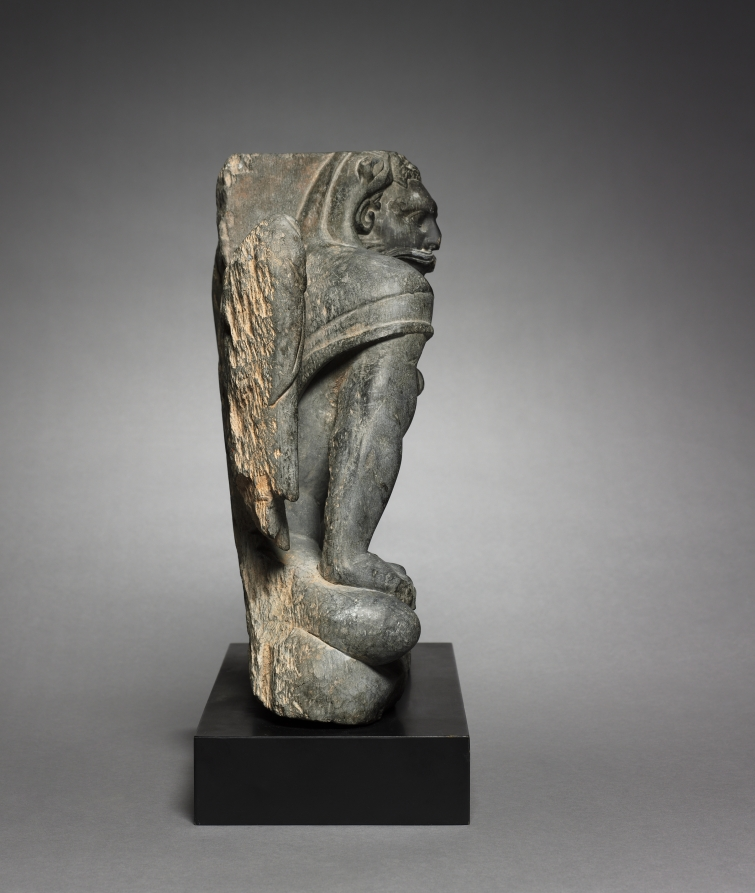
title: Winged Atlas-Hercules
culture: Pakistan, Gandhara, Gandhara period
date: 200s CE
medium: schist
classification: Sculpture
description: In Buddhist art of the Gandharan region during the time of heightened contact with the Mediterranean world, the figure of Atlas was adopted, but given wings so as to appear superhuman. This figure has been conflated with the image of Hercules, who wears the skin of the Nemean lion, and relieved Atlas of his duties for a short time. Repeated images of composite Atlas-like figures surrounded the base of the monuments called stupas, which were solid domes, and can be understood as symbols for the sky, which would have appeared as though supported by rows of titanic figures. Other examples of this figure hold a thunderbolt (vajra) in one hand, suggesting that he could also allude to Vajrapani, an early protector divinity of the Buddha. Images of Vajrapani can combine attributes of Hercules, Zeus, and Hermes.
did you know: This figure combines the attributes of Atlas, Hercules, and Vajrapani.